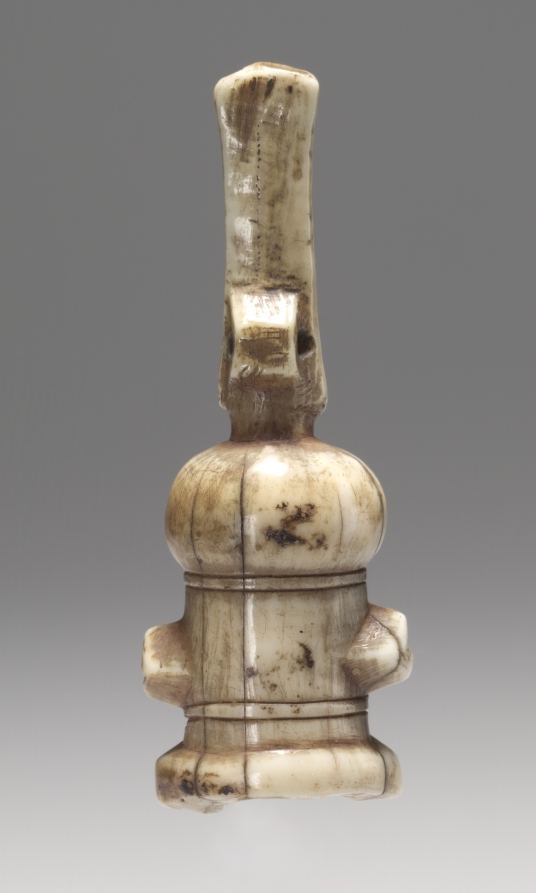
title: Whistle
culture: Central Africa, Democratic Republic of Congo or Angola, Chokwe people, late 19th century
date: late 1800s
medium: Probably hippopotamus ivory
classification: Musical Instrument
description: Carved out of ivory or wood in a variety of shapes, Chokwe whistles often bear miniature, stylized renderings of masks. Cikunza, the "patron saint" of the boys' initiation into manhood, is depicted with a pointed extension imitating the horn of a road antelope, symbolizing the fertility spirit. Typically such whistles were used by men during the hunt to communicate with their co-hunters and to call their dogs. They were either worn attached to a string as a necklace or tied to a spear.